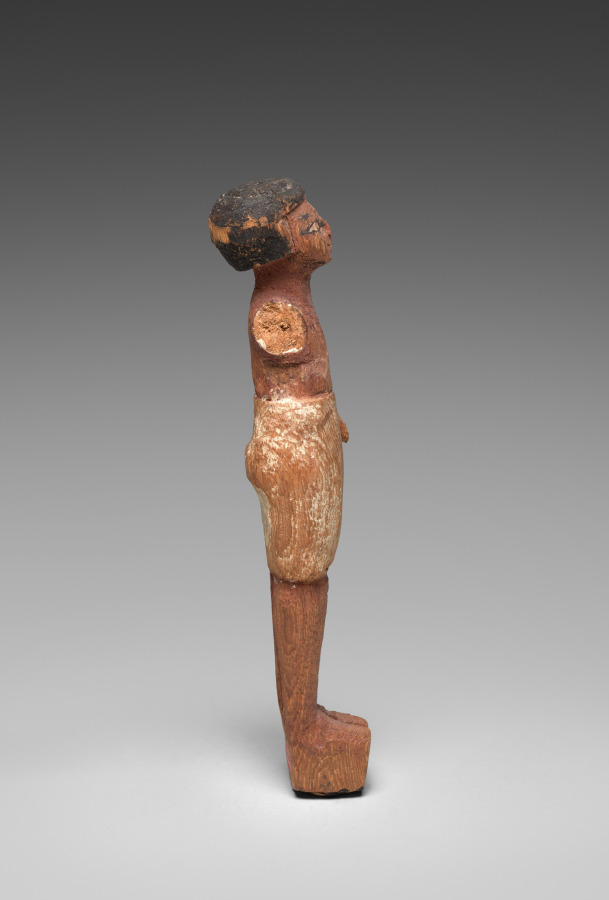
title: Model Figure of a Man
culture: Egypt, Middle Kingdom (2040–1648 BCE), Dynasty 12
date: 1980–1801 BCE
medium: painted wood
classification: Funerary Equipment